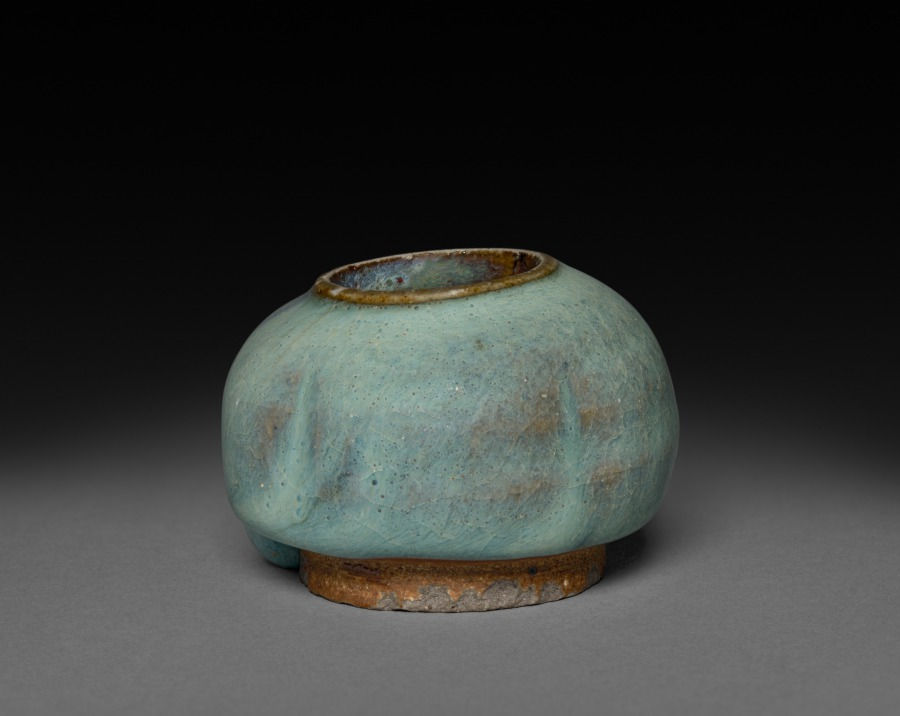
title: Small Lobed Jar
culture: Northern China, Jin dynasty (1115-1234) - Yuan dynasty (1271-1368)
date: 1115–1368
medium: glazed buff stoneware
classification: Ceramic